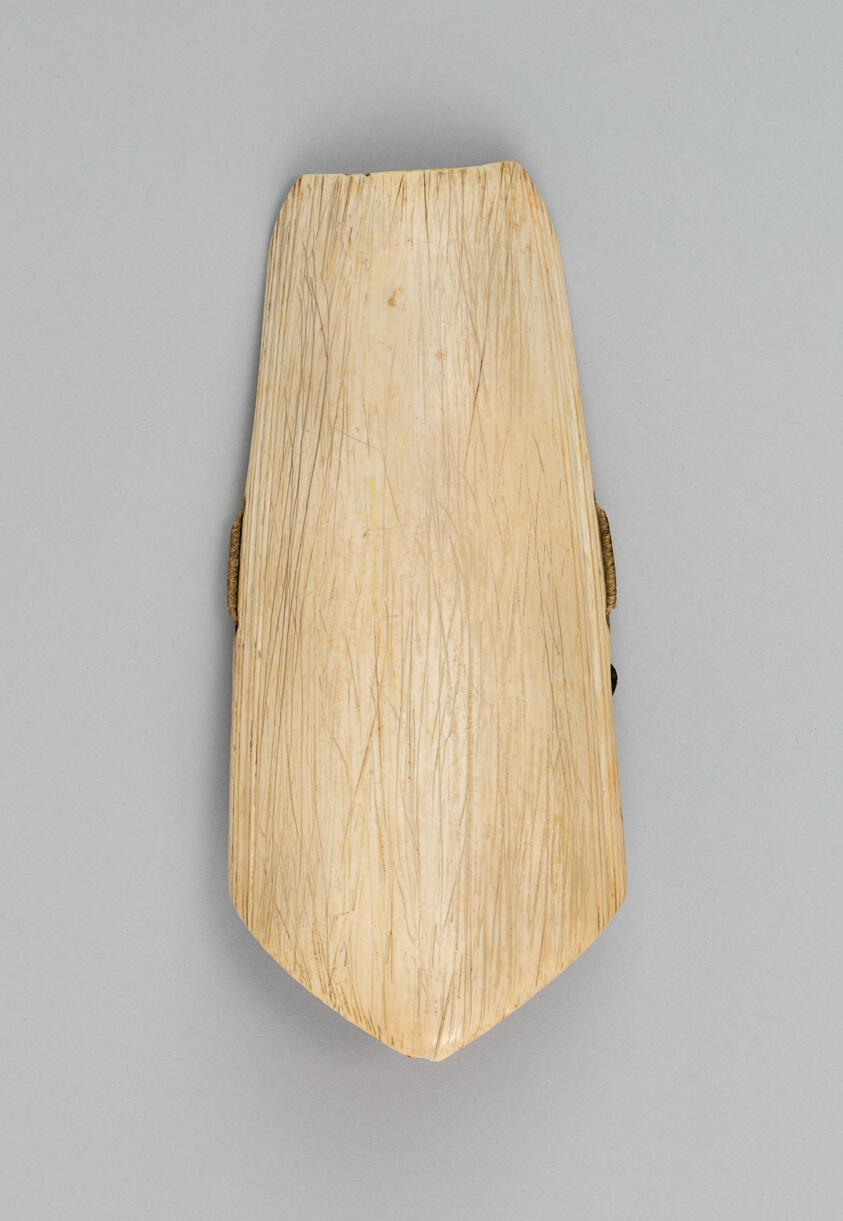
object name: Armor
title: Archer's Arm Guard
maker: European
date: 16th/17th century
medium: Ivory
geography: Europe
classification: arms and armor, miscellaneous; arms and armor; armor